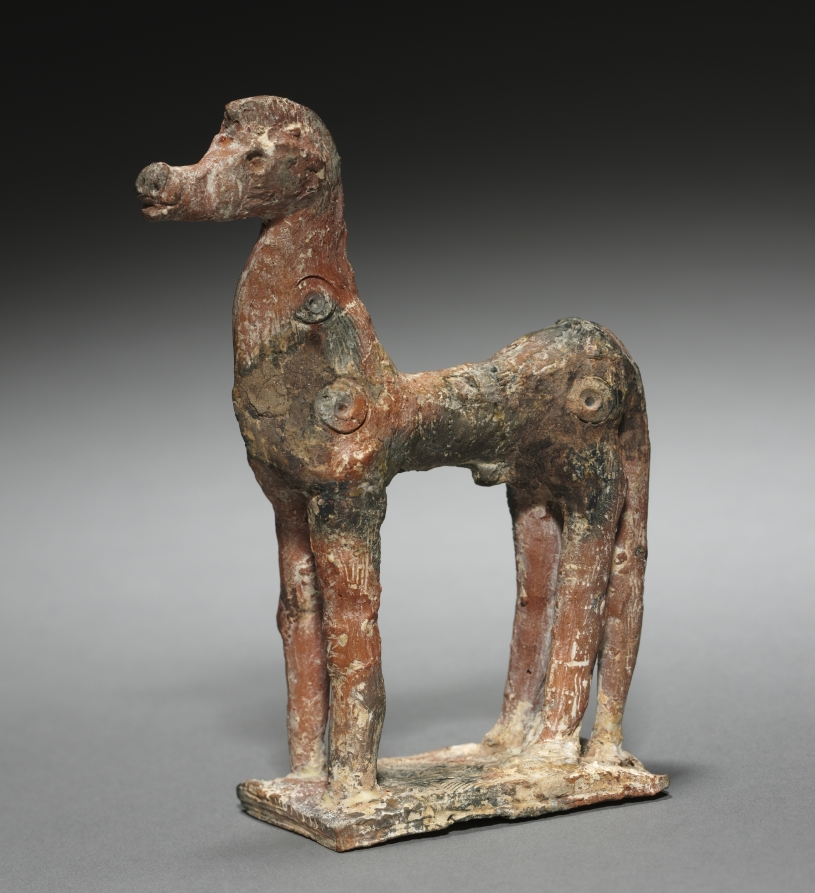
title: Horse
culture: Greece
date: c. 750–725 BCE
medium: terracotta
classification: Sculpture